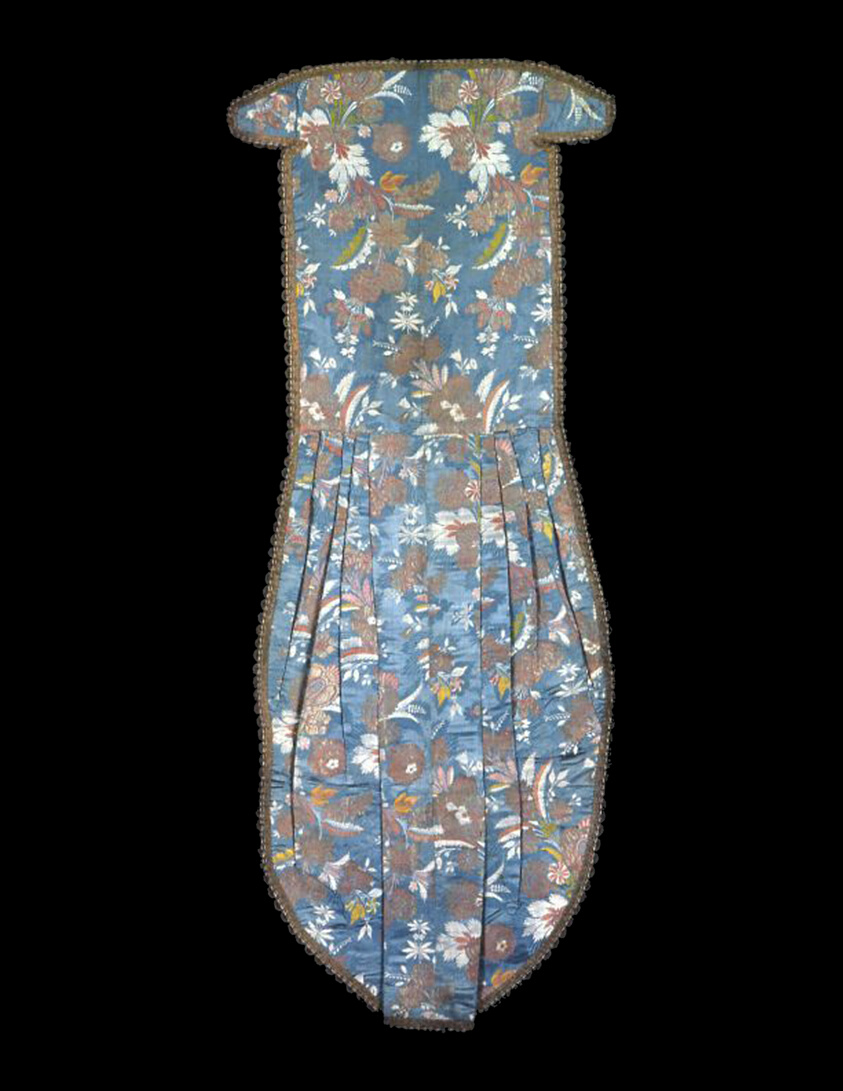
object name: Textile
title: Baptismal Robe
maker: Norway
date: c. 1712/13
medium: Silk, gilt-metal-strip-wrapped silk, 4:1 satin weave with supplementary brocading wefts bound in twill interlacing and self-patterned by reversing of faces; lined with silk and gilt-metal strips; plain weave with supplementary patterning wefts; edged with silk, gilt-metal-strip-wrapped silk, plain weave with supplementary patterning warps, and eccentric wefts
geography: Norway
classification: textile; weaving; costume